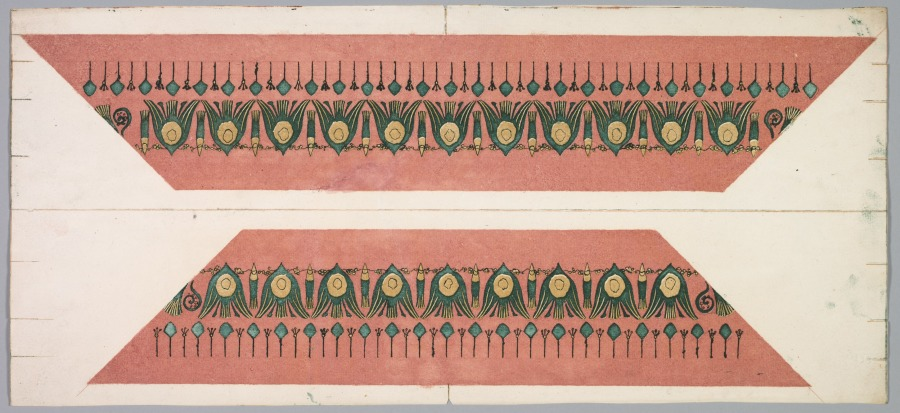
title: Embers Glow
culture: France, 19th century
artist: Theodore Roussel (French, 1847–1926)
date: 1890–1897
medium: 1 color etching and aquatint mounted on original aquatint mount with etched and aquatinted framing papers surrounding the impression, 7 color etching and aquatint proofs, 2 "Lotus Pattern Frame" proofs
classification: Print